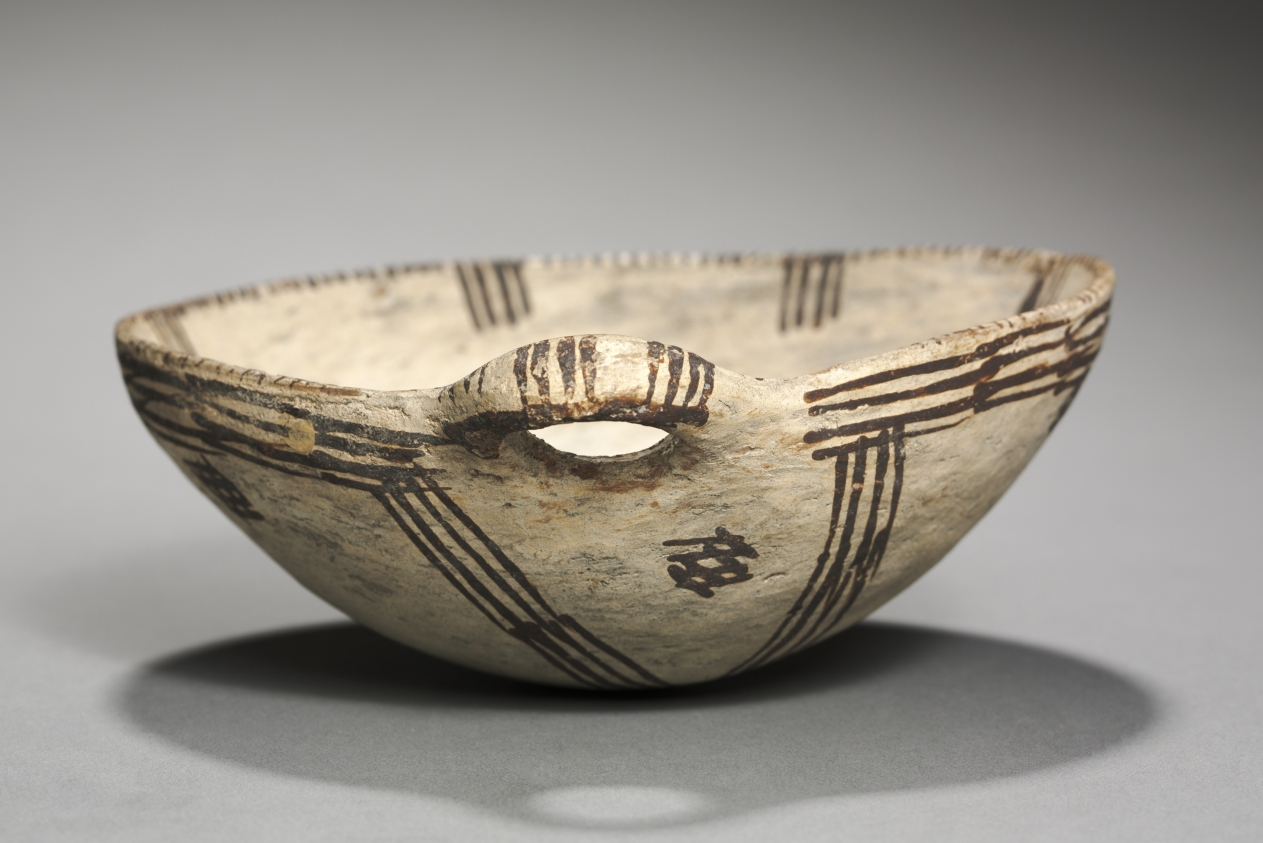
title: One-Handled Bowl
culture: Cyprus, late Cypriot II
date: c. 1450–1200 BCE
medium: white slip ware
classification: Ceramic